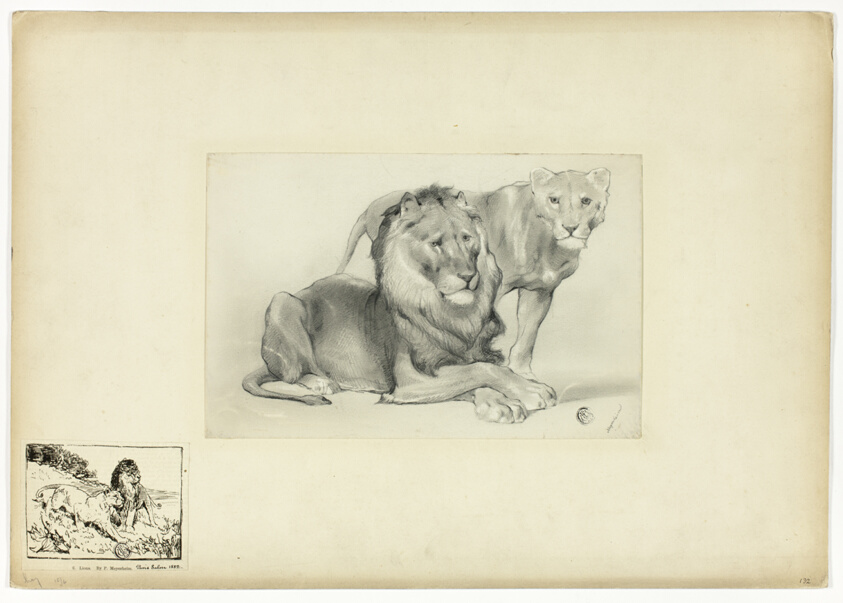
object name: Drawing and Watercolor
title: Lion and Lioness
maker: Paul Friedrich Meyerheim (German, 1842-1915)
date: c. 1882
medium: Graphite with stumping and scraping on ivory wove card, laid down on cream wove board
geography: Germany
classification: graphite; paper; drawings (visual works); prints and drawing